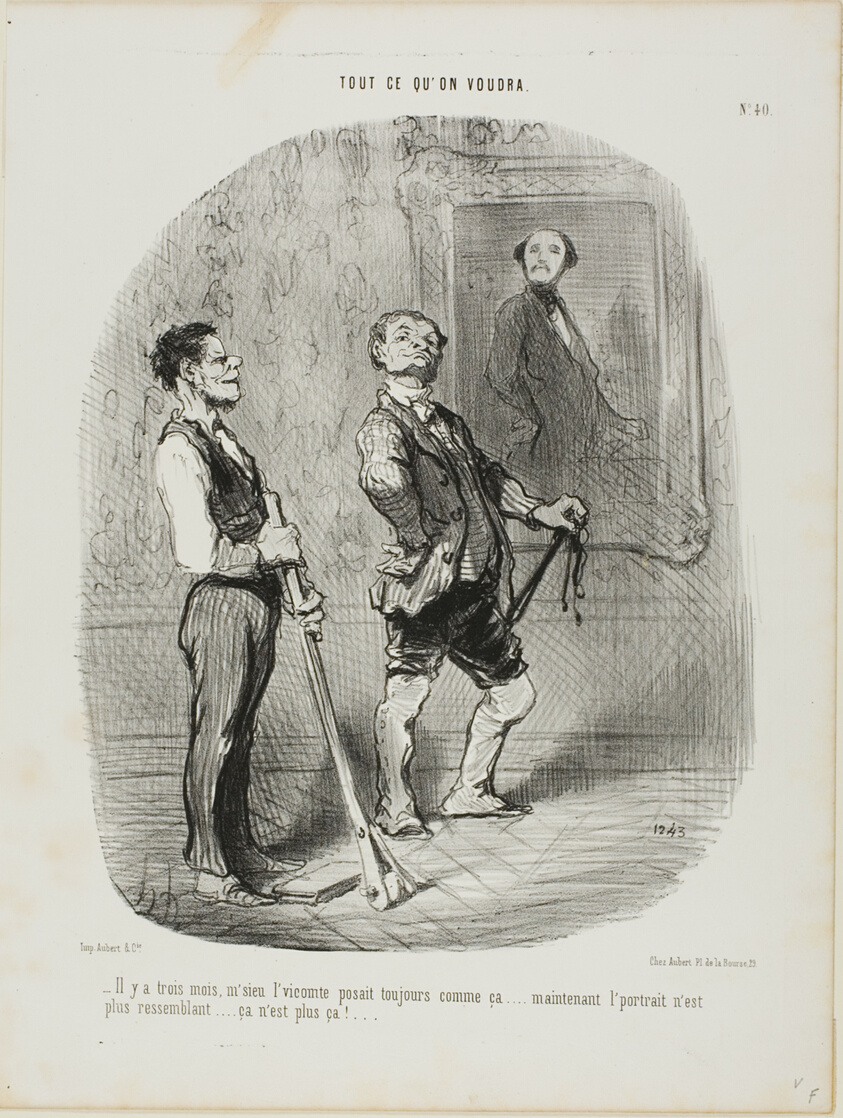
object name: Print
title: “- Three months ago, the Count sat model like that.... nowadays there is no more similarity..... everything seems to be wrong,” plate 40 from Tout Ce Qu'on Voudra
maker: Honoré Victorin Daumier; French, 1808-1879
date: 1848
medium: Lithograph in black on white wove paper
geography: France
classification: lithograph; print; prints and drawing